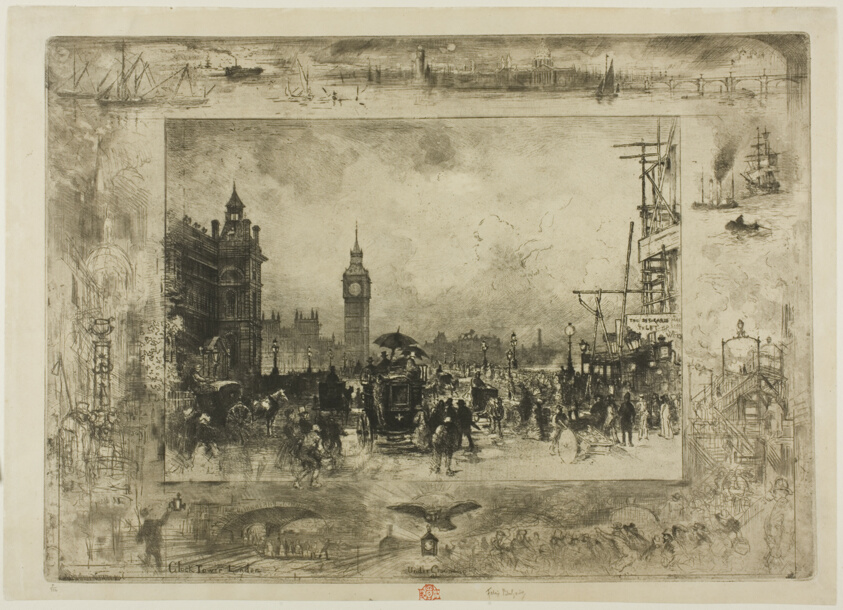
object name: Print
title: Westminster Clock Tower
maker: Félix Hilaire Buhot (French, 1847-1898)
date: 1884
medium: Etching, drypoint, roulette, aquatint, and spit-bite on ivory Japanese paper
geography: France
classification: etching; print; prints and drawing